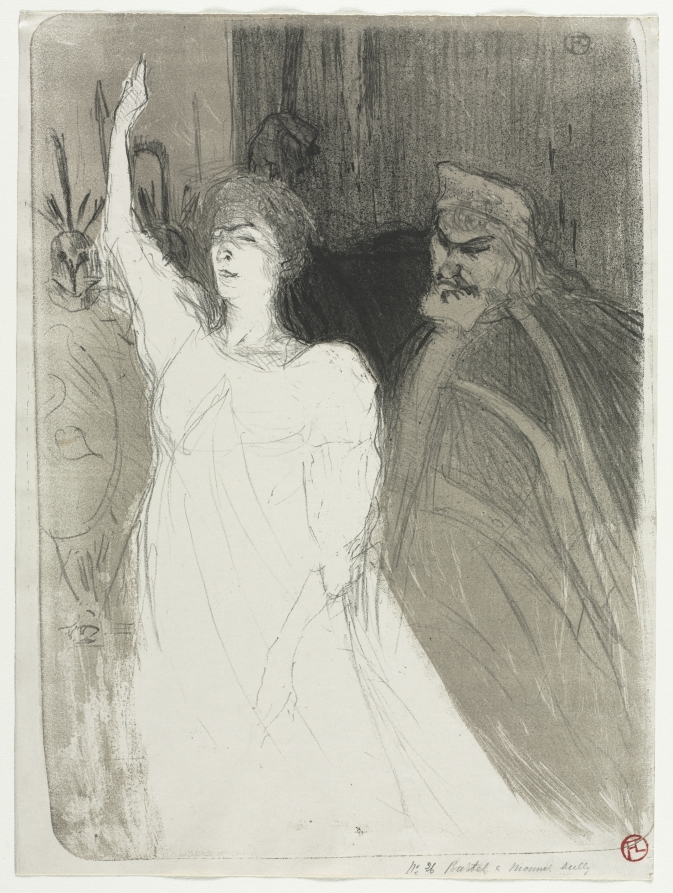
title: A Princely Idyl, Clara Ward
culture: France, 19th century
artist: Henri de Toulouse-Lautrec (French, 1864–1901)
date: 1894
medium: lithograph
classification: Print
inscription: On stone, upper right corner: "H. T-L."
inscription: in graphite, lower margin, right: "No. 26 Bartet & Mounet Sully"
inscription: Red stamp, lower right corner: "T. Lautrec"